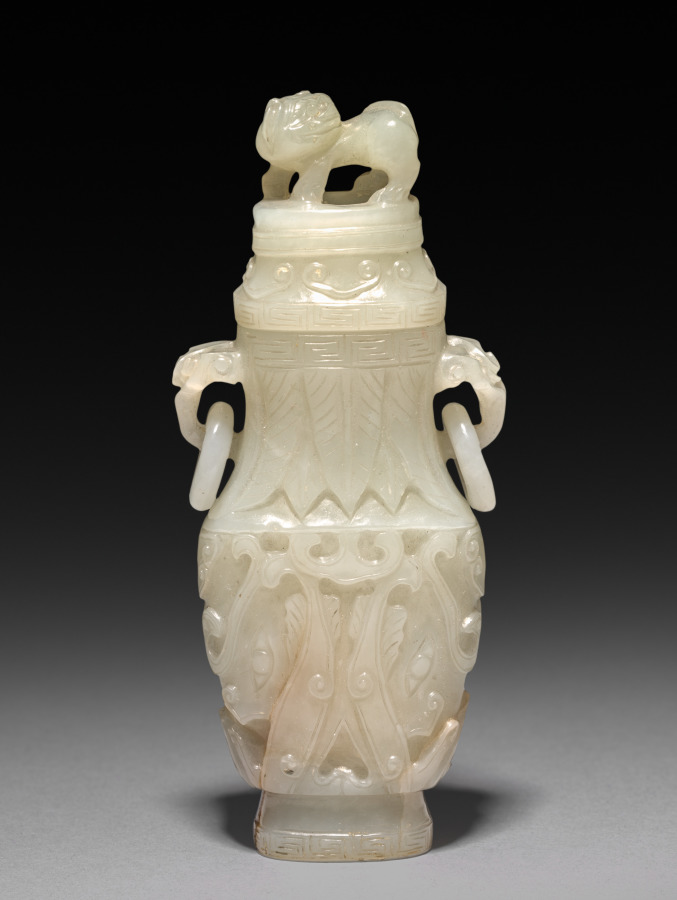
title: Chinese Jade Incense Set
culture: China, Qing dynasty (1644-1911)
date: 1644–1911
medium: jade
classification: Jade